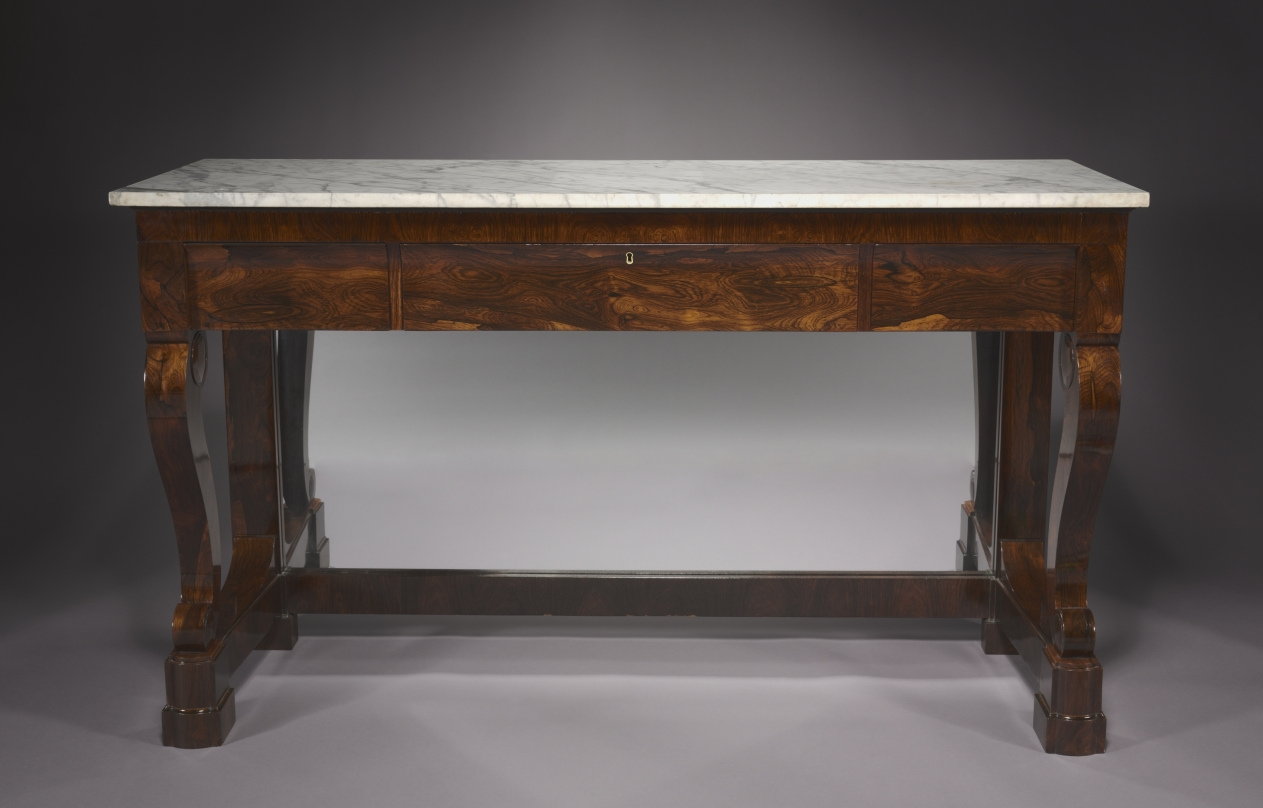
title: Sideboard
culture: America, New York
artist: firm of Duncan Phyfe and Son (American, 1768–1854)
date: c. 1840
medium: chiefly rosewood veneer with pine and poplar secondary woods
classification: Furniture and woodwork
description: Easily the most famous American furniture maker, Duncan Phyfe (born Scotland, 1768-1854) gave his name to New York furniture that is similar to English Sheraton pieces of the early 19th century-characterized by simple designs, straight lines, thin legs, and classical ornamentation. Despite the fashionable success enjoyed by his work, Phyfe responded to stylistic changes, and by the 1830s had evolved a more severe mode that has been termed the "Grecian plain style." This sideboard and its cellarette (a cabinet for storing wine or liquor) are superb examples of that taste, relying for their effect on relatively simple structural forms with ornamentation largely limited to the use of boldly patterned rosewood veneers.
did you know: This sideboard and cellarette would have graced a 19th-century room. Notice the keyholes on the drawers of both pieces. Expensive silver utensils were stored in the sideboard and wine was kept under lock and key in the cellarette.